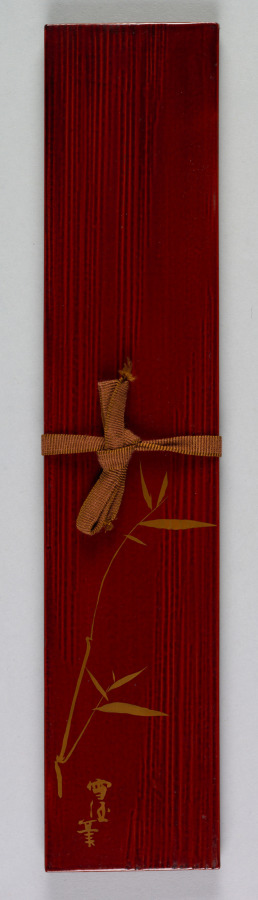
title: Poem Card Box with Lid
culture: Japan, Meiji period (1868–1912)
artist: Kamisaka Sekka (Japanese, 1866–1942)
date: 1868–1912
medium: wood with lacquer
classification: Lacquer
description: Long, decorated cards for the calligraphic presentation of poems are called tanzaku in Japanese. This box is a collaboration between the designer Kamisaka Sekka and the lacquer artist Iwamura Sadazō. Together, they crafted this box with a golden bamboo lid, and filled it with cards decorated with gold leaf designs.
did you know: Poems written on long poetry cards, or tanzaku, are often collected into albums called tekagami in Japanese.